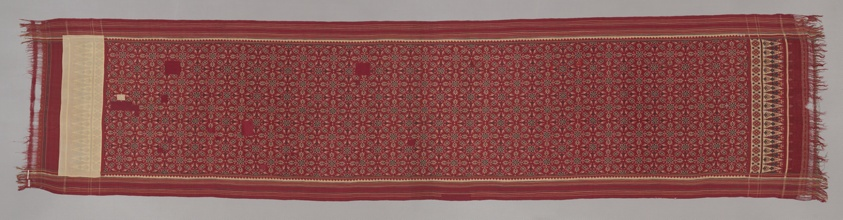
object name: Textile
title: Patolu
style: indonesian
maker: Gujarat, India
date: 18th/19th century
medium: Silk and silver-metal-strip-wrapped silk, stripes of warp and weft resist dyed (double ikat), plain weave, stripes of weft resist dyed (weft ikat), plain weave , bands of plain weave and bands of open warps; plied and knotted main warp fringe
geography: India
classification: textile; weaving - printed